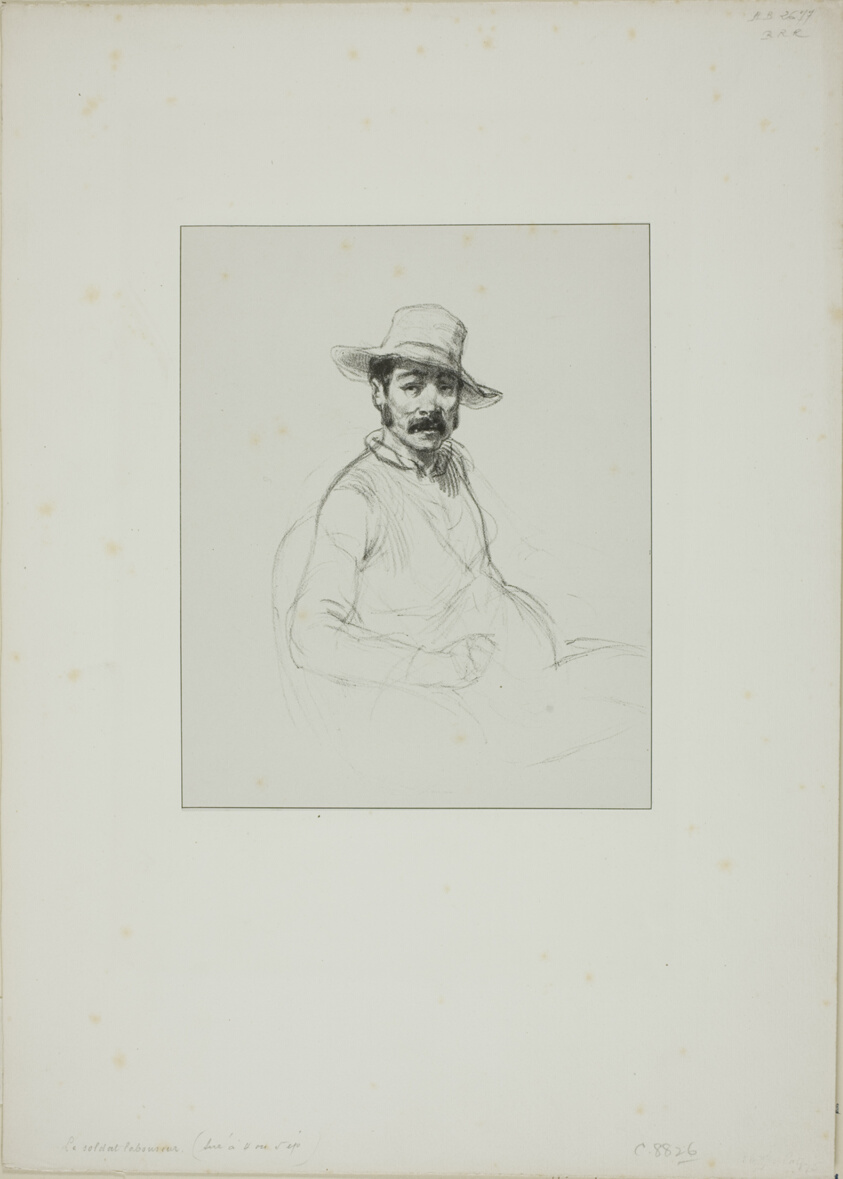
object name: Print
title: Untitled (The Soldier-Laborer)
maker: Paul Gavarni (French, 1804-1866)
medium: Lithograph in black on light gray China paper, laid down on ivory wove paper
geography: France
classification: lithograph; print; prints and drawing